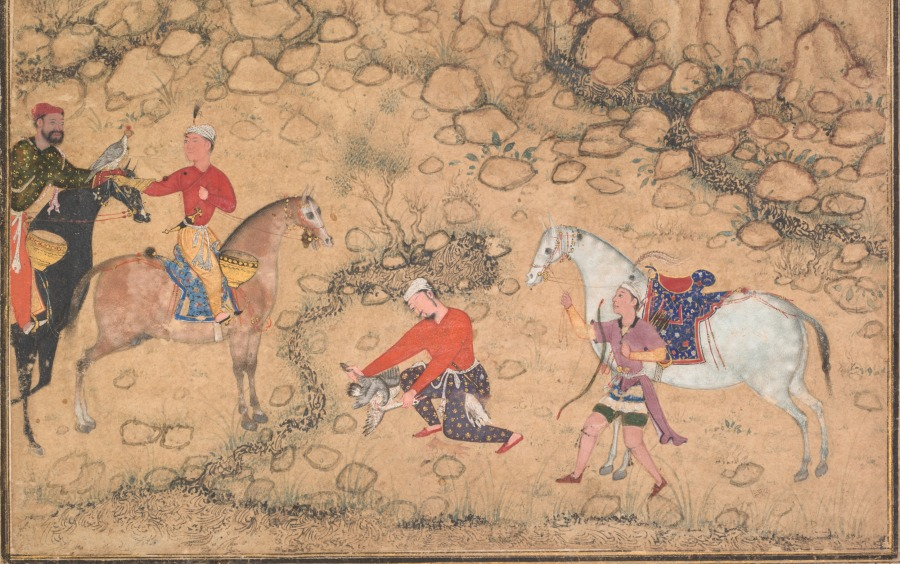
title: Hunting with falcons in a landscape (recto)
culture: Mughal India, court of Akbar (reigned 1556–1605)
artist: attributed to Abd al-Samad (Persian, c. 1510–1600)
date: c. 1558–60; borders added probably 1700s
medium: Gum tempera, ink, and gold on paper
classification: Painting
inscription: Inscription in upper right in nasta‘liq script, probably during the 1700s: the work of Mir Sayyid Ali, the illustrator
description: Mughal princes hunted on horseback with falcons. The hunting party would ride out into the wild and flush the prey from the brush. Then, its hood removed, the falcon would chase the prey and bring it down. This important work is thought to have been painted by one of the Persian artists Akbar’s father brought to India from Iran shortly after his arrival in India. The delicacy of the diminutive figures and the gently modeled rocks of the arid landscape contrast to the boldly dynamic paintings made by Indian artists.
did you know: The hunter’s glove is on the ground, as he pulls his falcon off the duck.